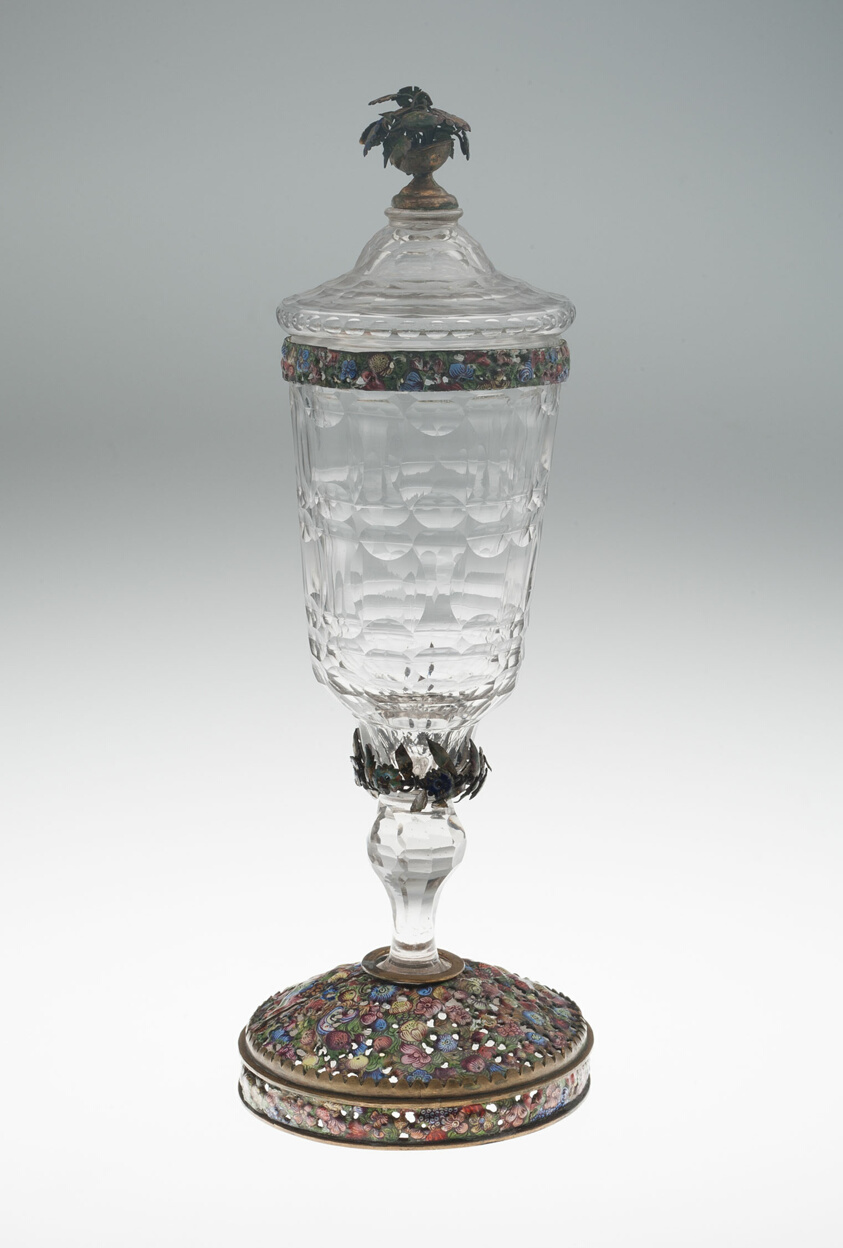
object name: Glass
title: Covered Goblet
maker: Bohemia, Czech Republic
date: c. 1700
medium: Glass with metal mounts and enamels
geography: Bohemia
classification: glass; european decorative arts